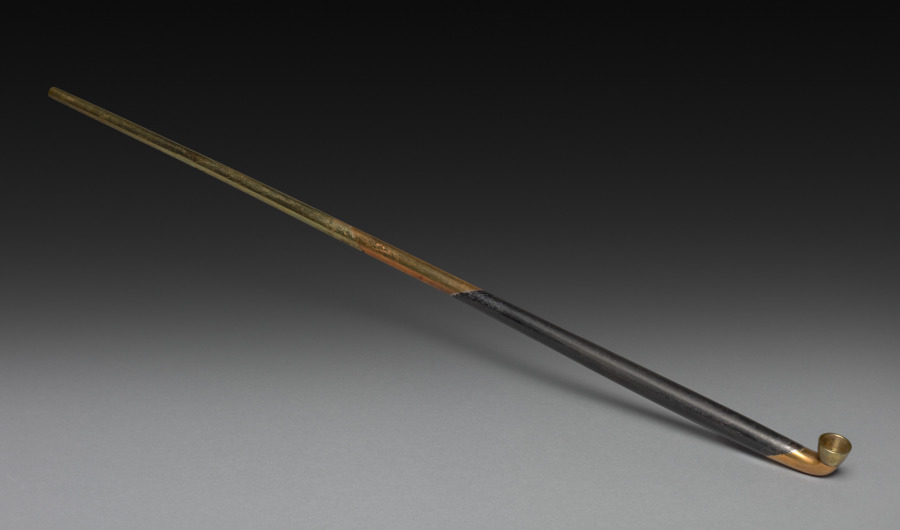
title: Tobacco Pipe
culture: Japan, Edo period (1615–1868)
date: 1700s–mid-1800s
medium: metals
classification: Miscellaneous